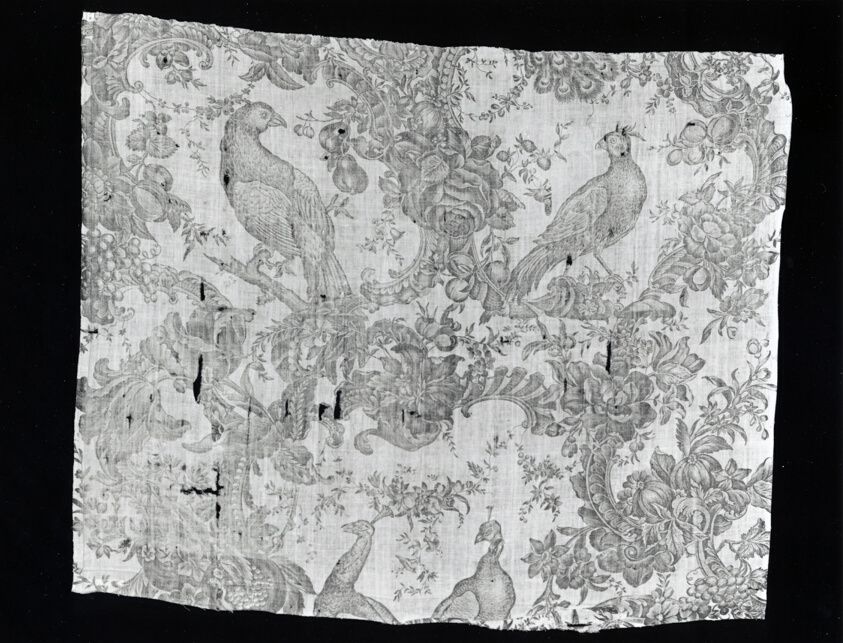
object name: Textile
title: Panel (Furnishing Fabric)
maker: Manufactured by Bromley Hall (English, 1694-1823); England, Middlesex, Poplar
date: 1765/75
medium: Cotton, plain weave; copperplate printed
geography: Middlesex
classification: textile; weaving - printed; furnishing textile